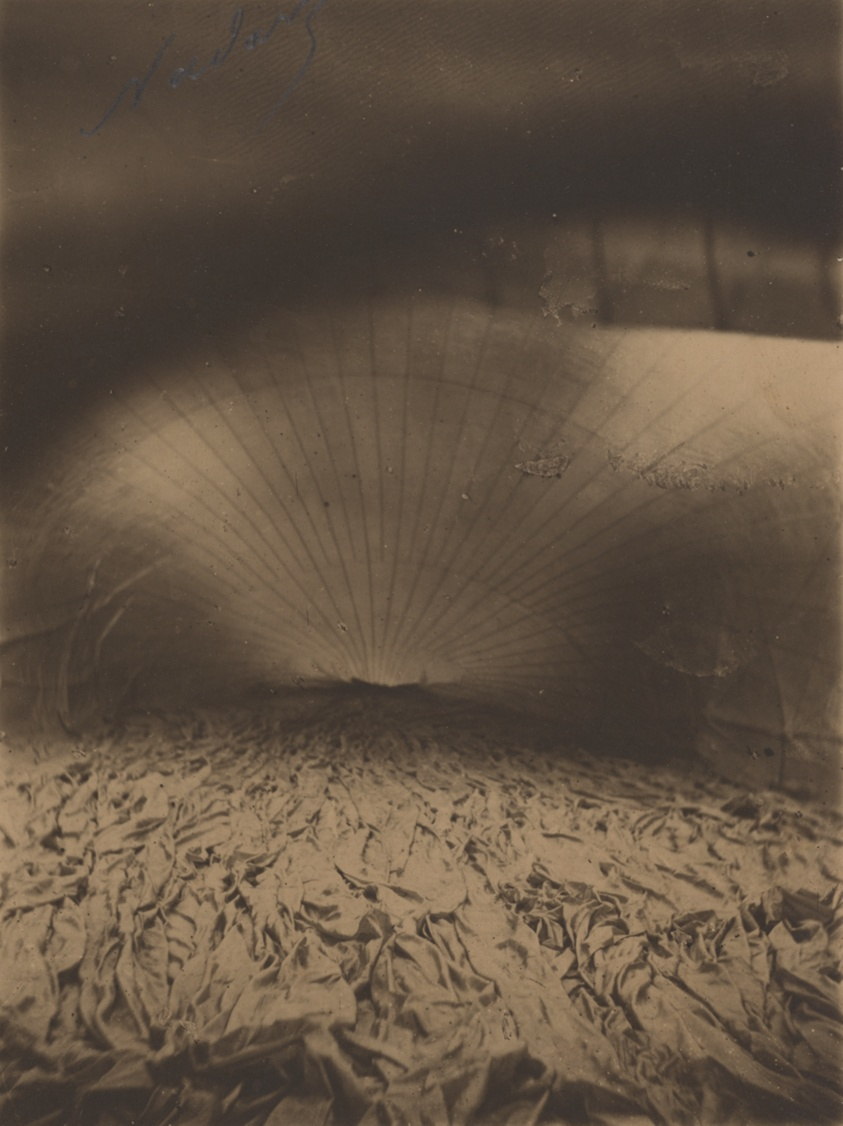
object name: Photograph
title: Interior of Le Géant Inflating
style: 19th century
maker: Nadar (Gaspard Félix Tournachon) (French, 1820–1910)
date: 1863, printed later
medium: Gelatin silver print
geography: France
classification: gelatin silver (developing-out-paper) pr; photographic process; photography; photograph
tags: Paris